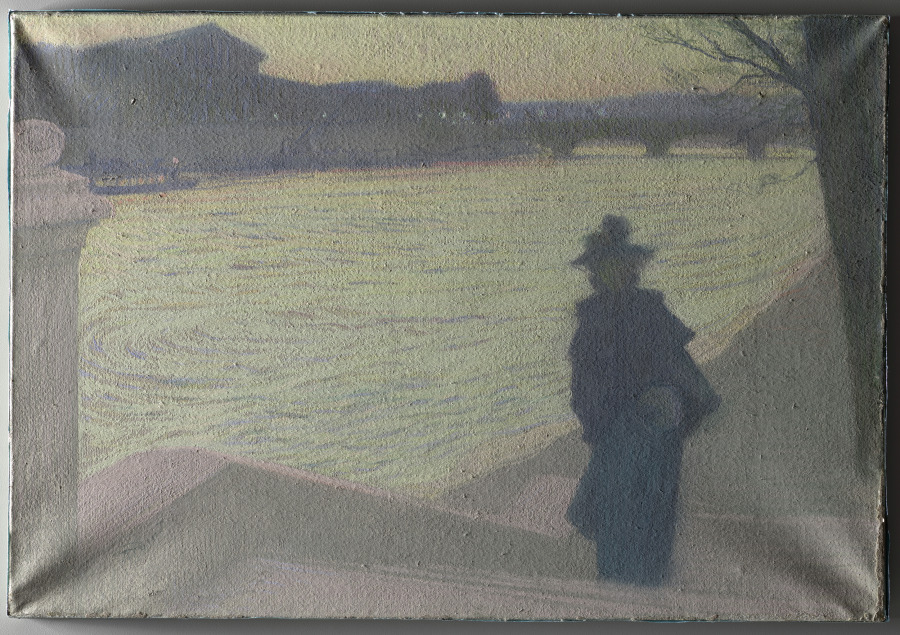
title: Quais de Seine en nocturne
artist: Armand Point (French, 1861–1932)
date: c. 1890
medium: pastel on gray wove paper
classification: Drawing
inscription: Signed, lower left, in pastel: APoint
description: Algerian-born artist Armand Point became involved in the Symbolist movement—which combined formal experimentation and imaginative subjects—while working in Paris during the 1890s. This drawing is one of many in which he represented his longtime companion and model, Hélène Linder. Here, she appears silhouetted against the brilliant reflection of setting sun on the city’s Seine River with swirling marks and bold tones that suggest the mood of the city as day transformed to night.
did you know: The walkways along the Seine River that this drawing depicts were a recent addition, constructed as part of a major redesign of Paris spearheaded by Baron Haussmann, a French official, during the mid-1800s.